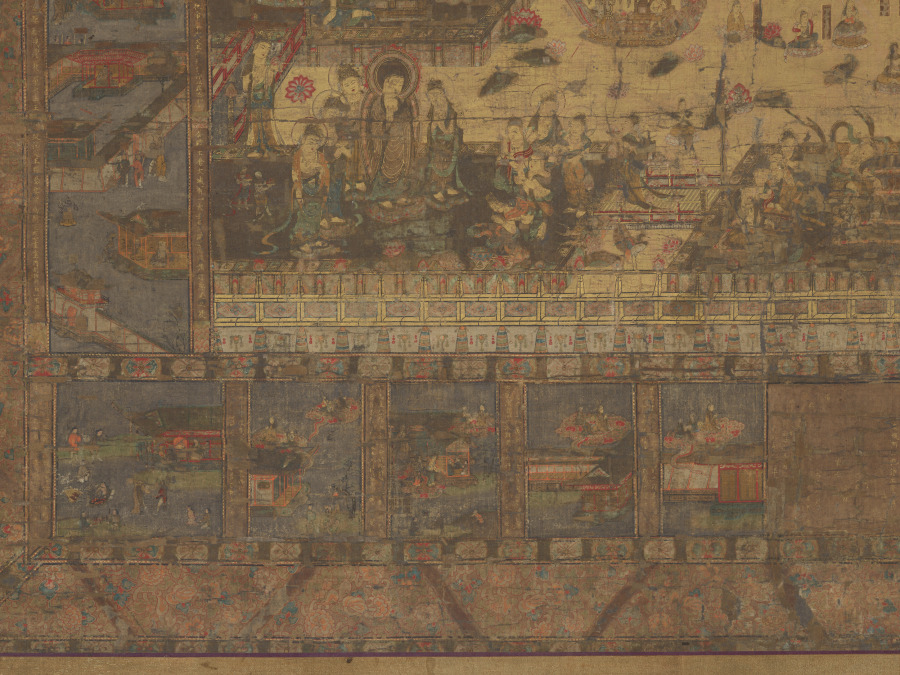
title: Taima Mandala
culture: Japan, Kamakura period (1185–1333)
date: early 1300s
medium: hanging scroll; ink, color, and gold on silk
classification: Painting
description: This painting is a copy after an 8th-century woven mandala belonging to the temple Taimadera. The composition is based on a sacred text that describes the Buddha Shakyamuni’s explanation of Amida’s Pure Land to Queen Vaidehi, as well as his instructions to her on visual meditation upon the Pure Land. The Pure Land appears at the center of the painting. To the left is the story of Queen Vaidehi’s encounter with Shakyamuni, and to the right are the scenes she is given to visualize. The bottom illustrates the nine levels of birth that can be attained in the Pure Land.